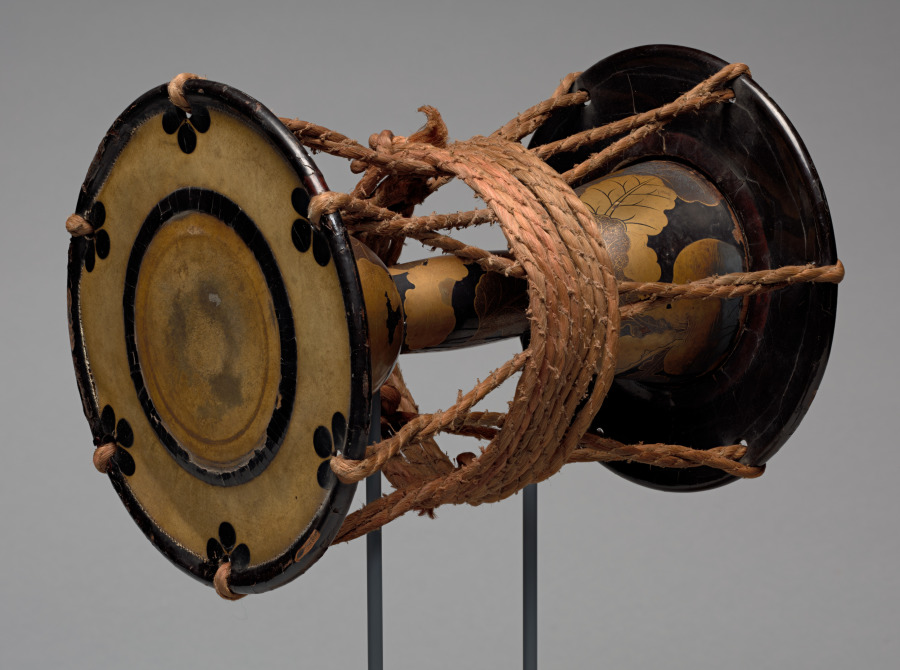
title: Tsuzumi Drum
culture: Japan, Edo period (1615–1868) to Meiji period (1868–1912)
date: 1800s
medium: Wood with lacquer and sprinkled gold powder (maki-e), hide, iron, and cord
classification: Musical Instrument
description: Tsuzumi hand drums were used as musical accompaniment for formal theatrical productions such as Noh, but also in traditional folk music. Small tsuzumi like this one are set against one shoulder, and held in place with one hand, while the other hand beats the heads. The sound is adjusted by regulating the humidity of the hide with one’s breath or spittle.